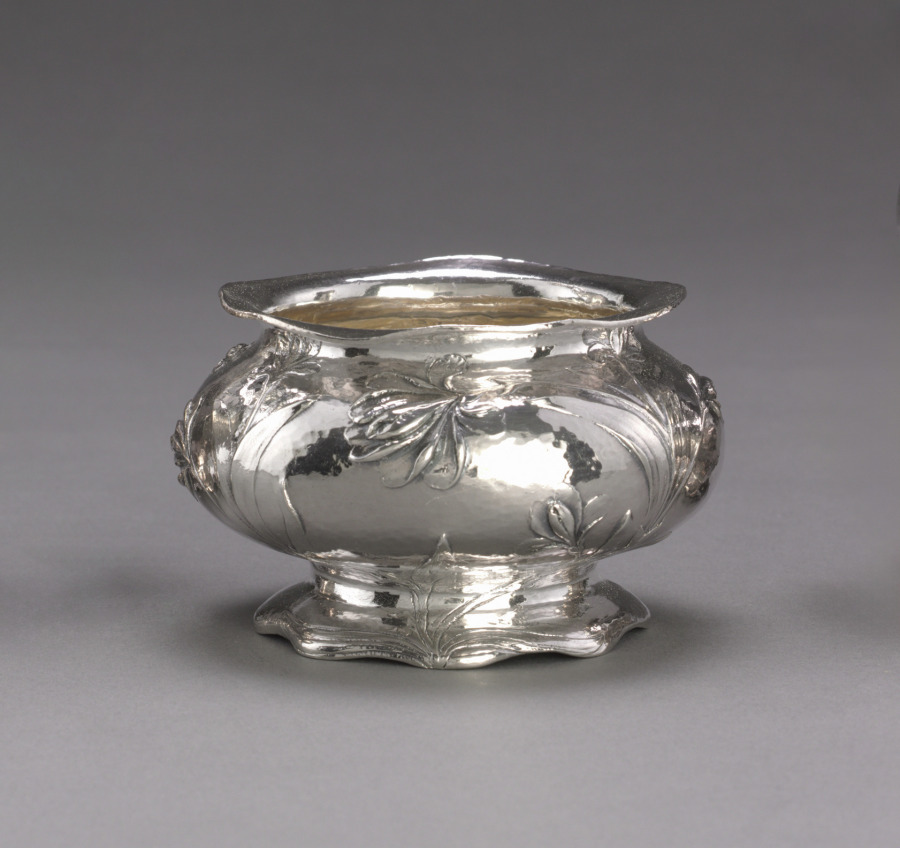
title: Martelé Creamer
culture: America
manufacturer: Gorham Manufacturing Company (America, est. 1831)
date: c. 1900–1910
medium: silver, ivory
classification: Silver